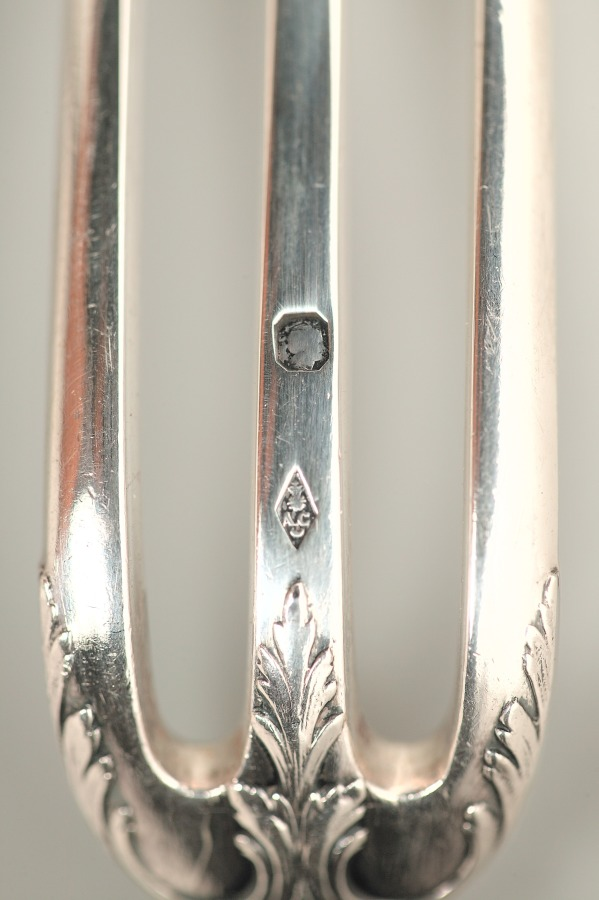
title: Dessert Fork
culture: France, 19th century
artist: Maison Cardeilhac (French)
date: c. 1880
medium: gilt silver and ivory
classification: Silver